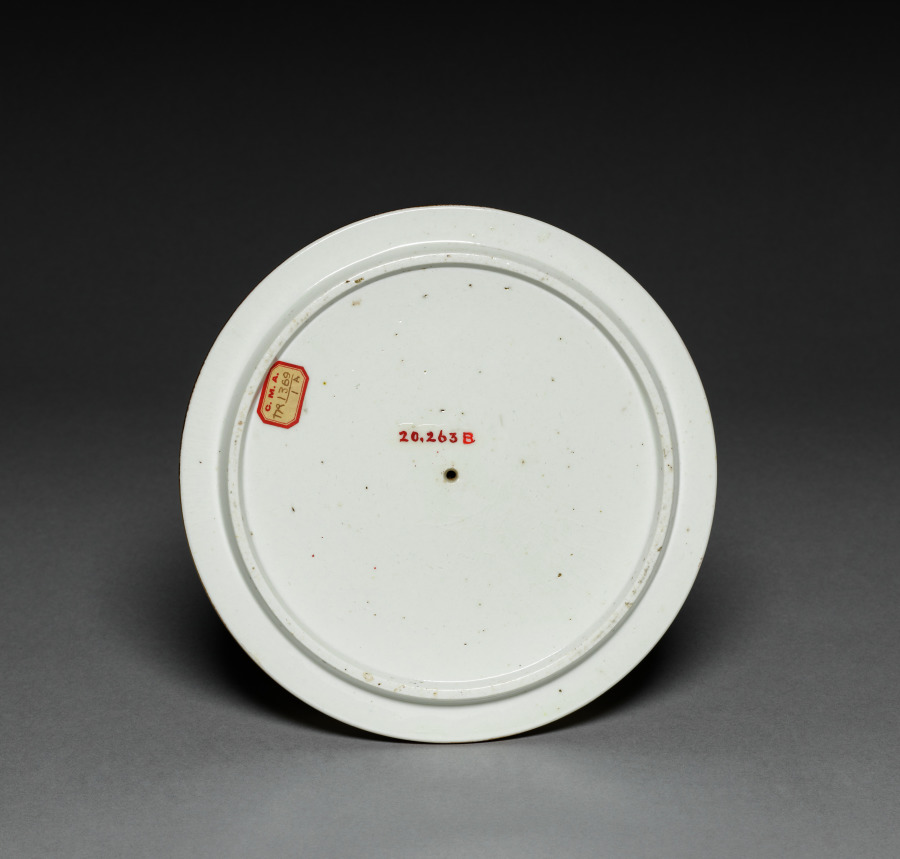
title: Cover for an Ice Pail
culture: England, Derby, 18th-19th century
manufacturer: Derby (Crown Derby Period) (British)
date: c. 1795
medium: porcelain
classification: Ceramic